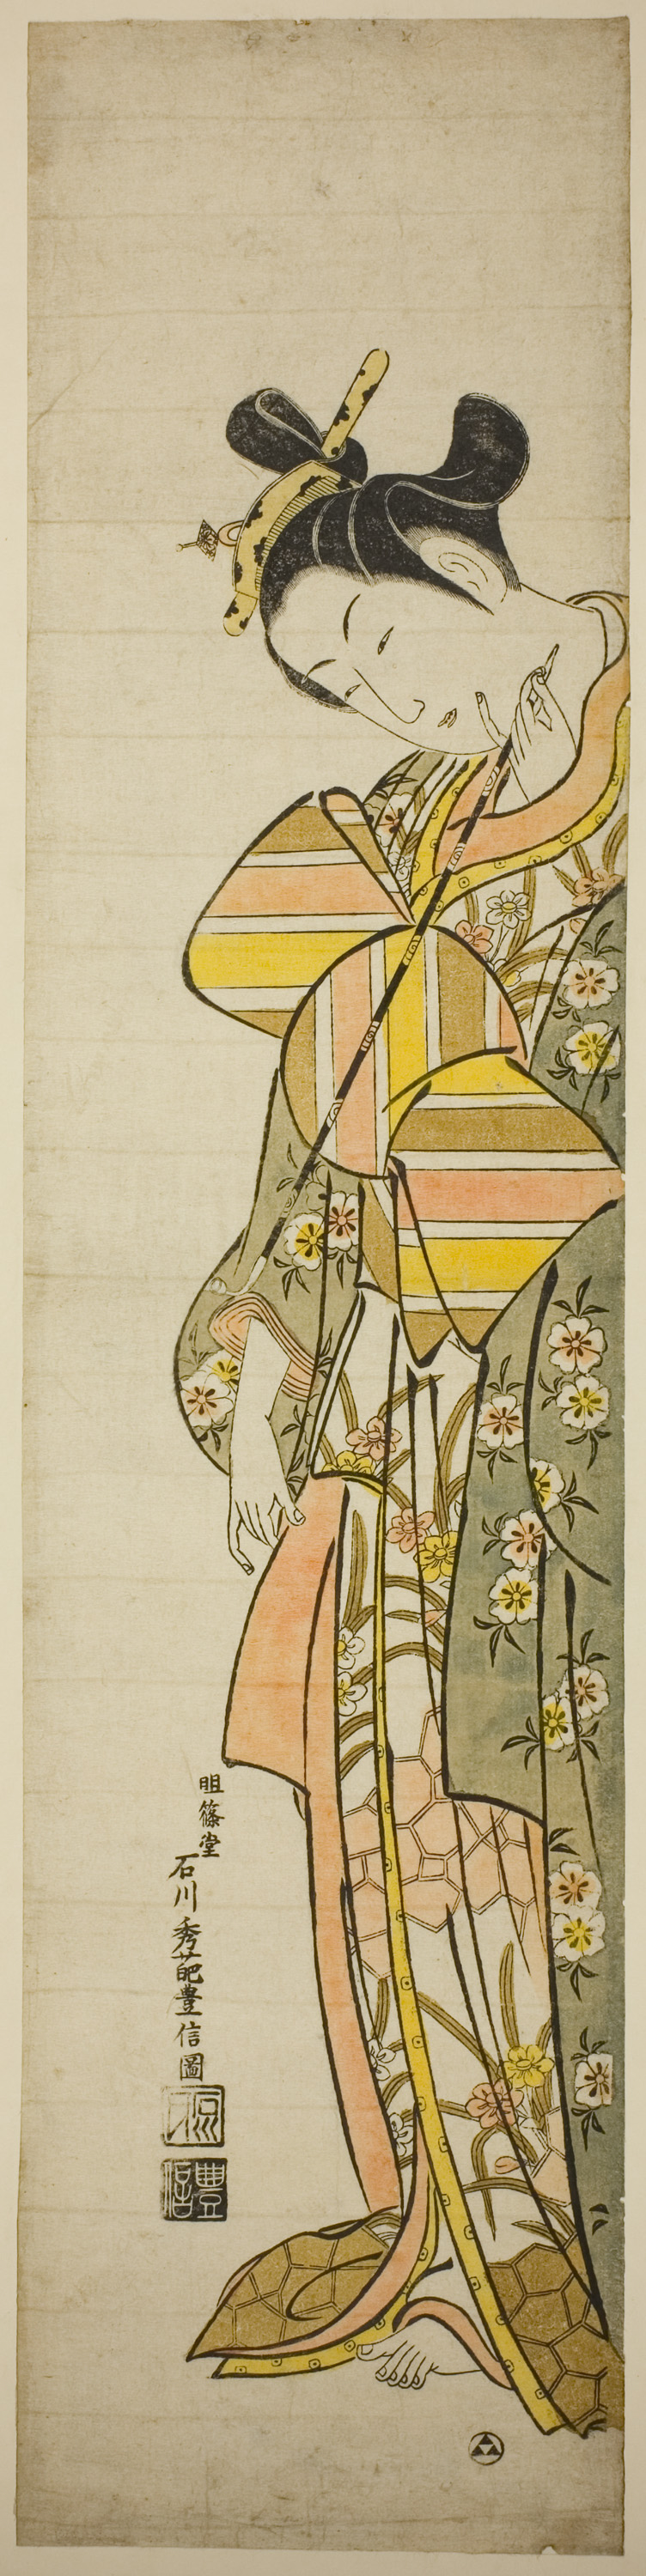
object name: Print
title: Courtesan Holding a Long Pipe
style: Japanese (culture or style)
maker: Ishikawa Toyonobu (Japanese, 1711–1785)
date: c. 1743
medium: Hand-colored woodblock print; habahiro hashira-e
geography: Japan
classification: woodblock print; print; asian art